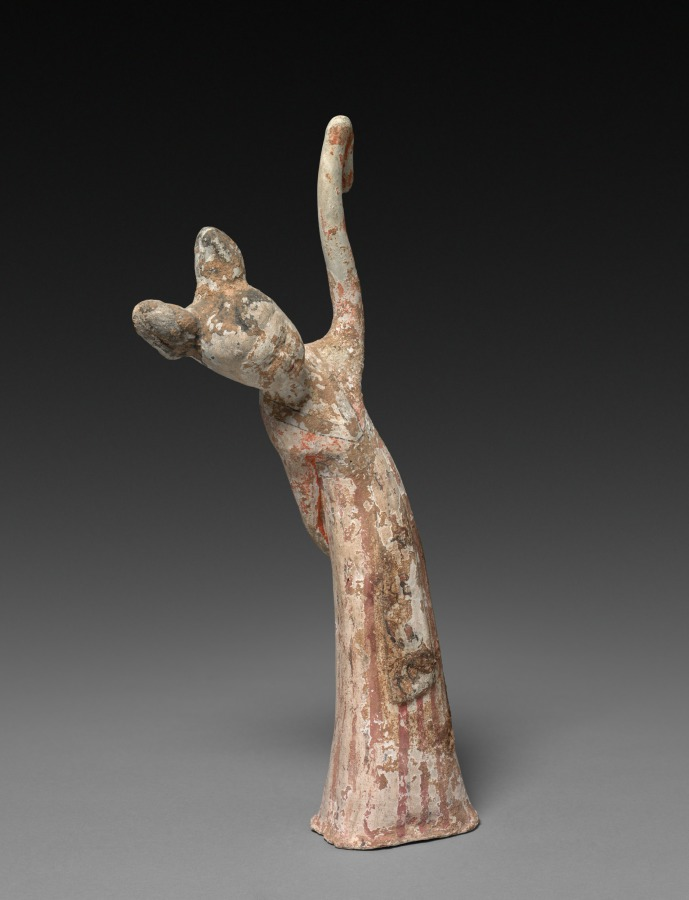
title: Female Dancer: Tomb Figurine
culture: China, Tang dynasty (618-907)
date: 650–700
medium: earthenware with polychromy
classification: Sculpture